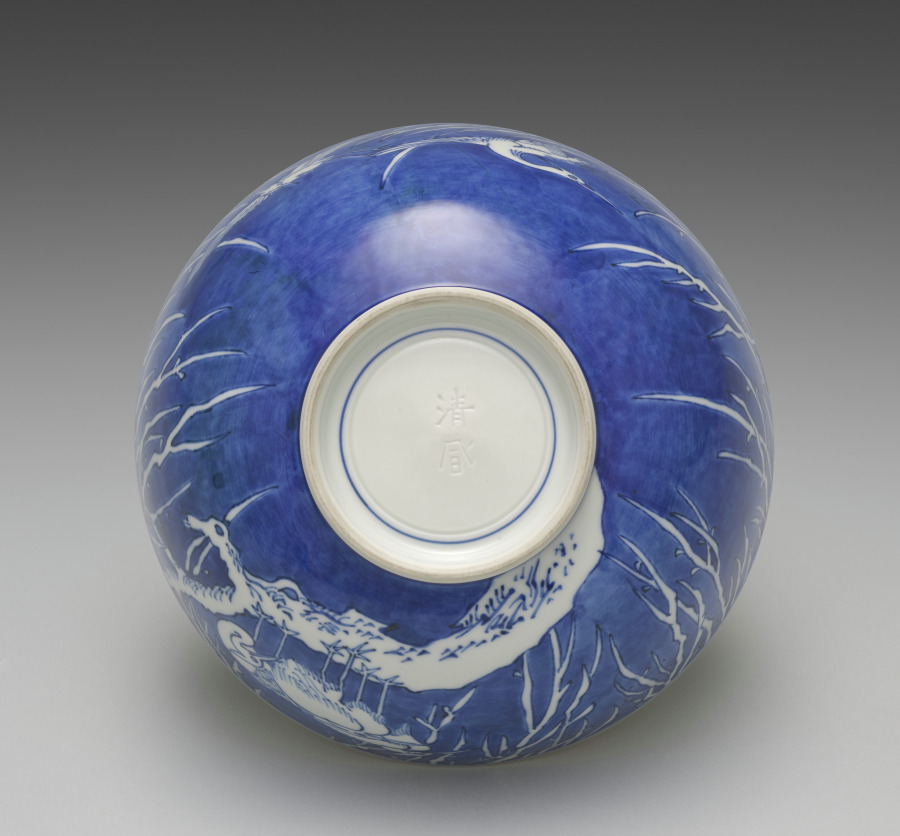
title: Sweets Bowl with Egrets and Willow in Snow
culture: Japan, Meiji period (1868–1912)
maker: Seifū Yohei III (Japanese, 1851–1914)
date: 1912–14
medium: Porcelain with underglaze blue and iron oxide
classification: Ceramic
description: For this sweets bowl, Yohei III designed a dramatic surround of egrets in a willow tree under heavy snow. The entire design is painted in cobalt blue under the transparent glaze. If one turns the bowl clockwise, two egrets come into view, one after the other. As they ascend, both struggle against the wind amid snow-laden weeping willow branches. They are followed by a stretch of willow branches that evoke the bitter cold. The sky is painted with blue washes all around the designs. The imagery culminates in a group of three egrets huddled together in the crotch of the tree. Of course, it is also possible to read the scene in the other direction, in which case the sheltering egrets look toward one of the flying egrets, who looks back at them, and it is the egret with wings outspread, looking directly down, who concludes the scene. Two thin bands of blue set off the design just under the bowl’s rim, and a band of brown iron oxide runs along the rim. Another two bands of blue run around the middle of the foot. The inside of the bowl’s box lid has an attestation by Yohei IV that it is the work of Yohei III.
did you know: This sweets bowl requires someone to rotate it to experience the birds observing one another.